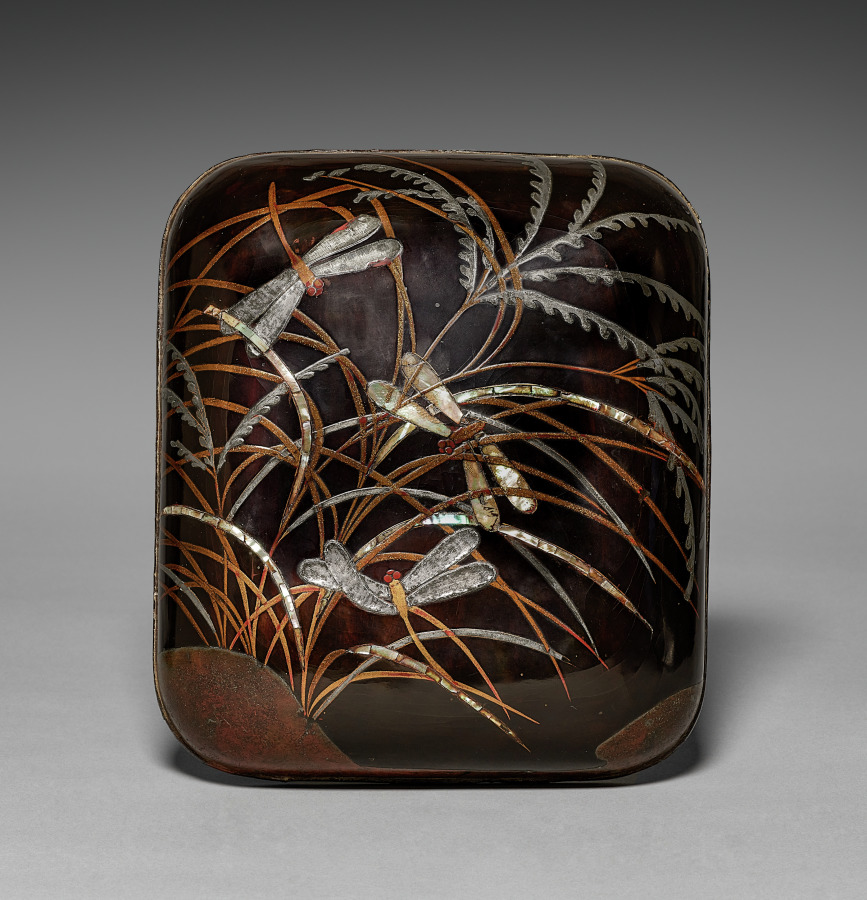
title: Letter Box (lid)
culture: Japan, Edo period (1615–1868)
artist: manner of Ogata Kōrin (Japanese, 1658–1716)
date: 1700s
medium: lacquer with pewter and mother-of-pearl inlay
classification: Lacquer